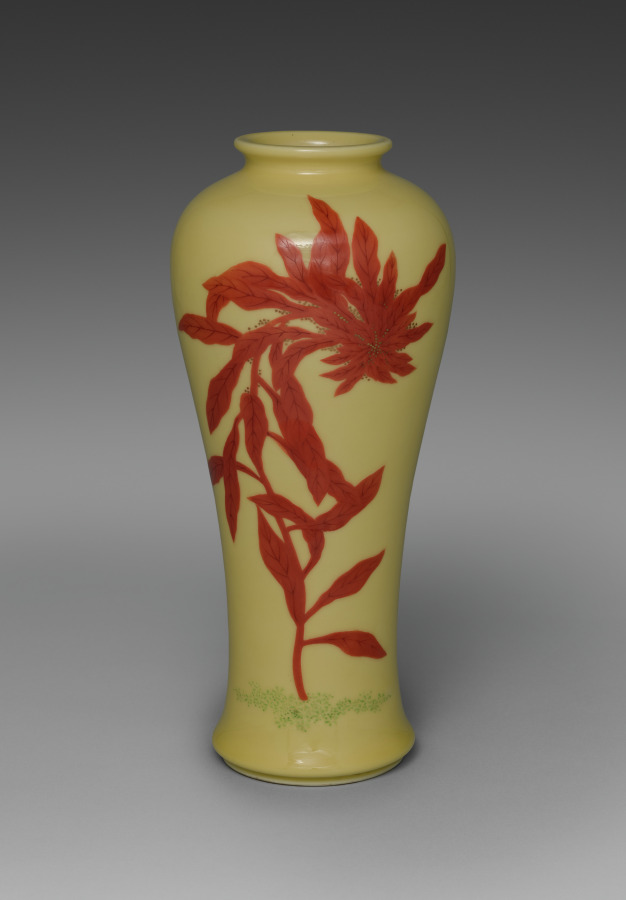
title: Prunus Vase with Amaranth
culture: Japan, Taishō period (1912–26)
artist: Seifū Yohei IV (Japanese, 1872–1951)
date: 1914–46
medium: Porcelain with yellow glaze and overglaze color enamel and gold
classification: Ceramic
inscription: 清風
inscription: 渡邊所藏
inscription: 清風造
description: Yohei IV’s interest in bold, colorful designs is on full display in this vase shaped like a “prunus vase,” or meiping (Japanese meipin). It has two colors of amaranthus on a yellow ground. It follows a design appearing on a sleeve-shaped vase by Yohei III. Yohei IV uses bright spring-green dots of overglaze enamel to suggest a ground plane in his yellow environment; he also uses red and magenta accented with wild gold cascades of dots for two plants he places on opposite sides of the vase, one much larger than the other. In Yohei III’s version, the body of the vessel is white, and the foliage of one plant is red with carefully painted veins in gold, while another plant strategically positioned behind it has a deep rust color, again carefully detailed in gold. In a sense, Yohei IV has deconstructed his father’s logical, balanced design and re-presented it as an emotive, lightheartedly chaotic one that sates the appetite for instant gratification, much as his father’s creation rewards the pursuit of elegance.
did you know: Seifū Yohei IV continued to create works in the studio’s signature colors but also produced pieces with strong color and flare that were his interpretations of Qing dynasty (1644–1911) glazes.